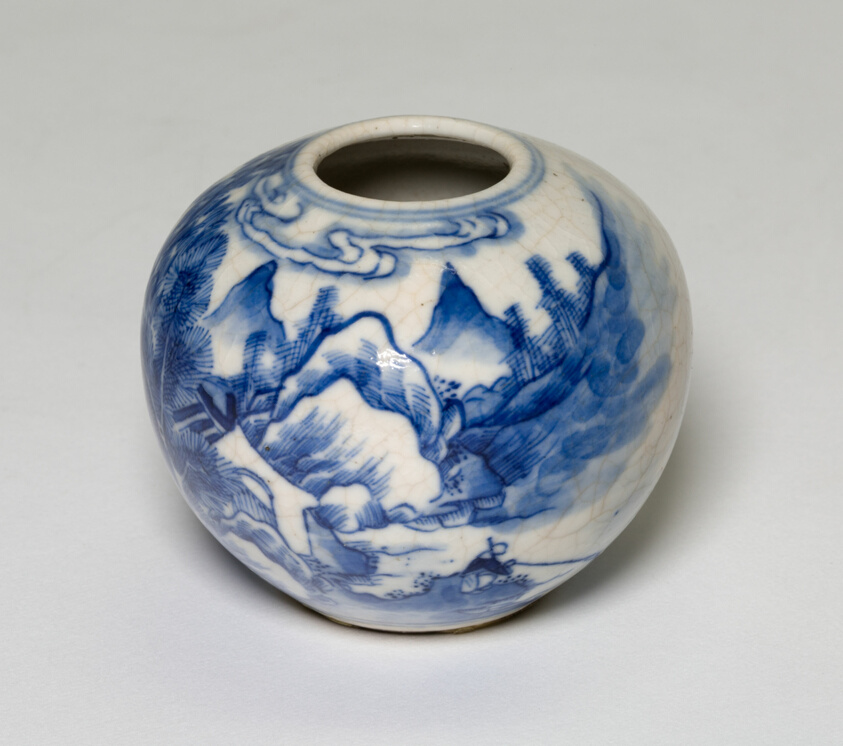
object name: Vessel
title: Miniature Jar with Landscape Scene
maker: China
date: Qing dynasty (1644–1911), Kangxi period (1662–1722)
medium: Porcelain painted in underglaze blue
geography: China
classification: porcelain; asian art; ceramics